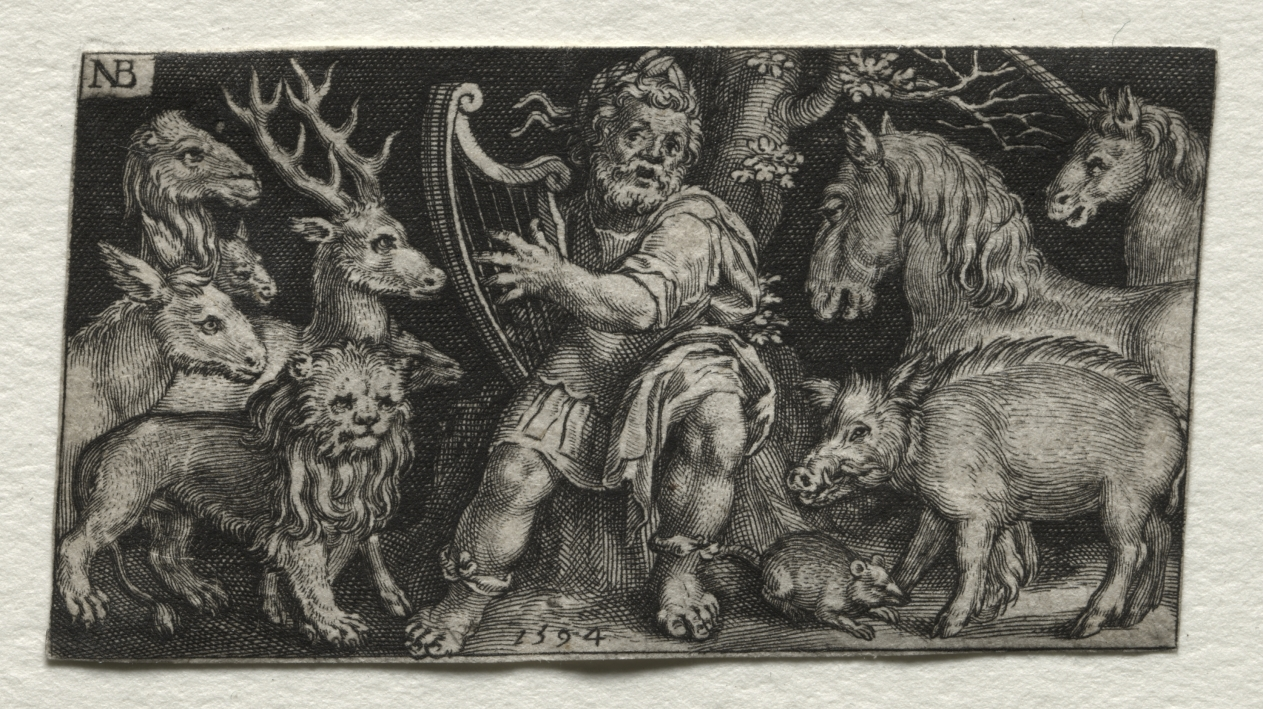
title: Orpheus Charming the Animals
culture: Netherlands, 16th century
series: Fighting Chimeras and Scenes to Aesop's Fables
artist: Nicolaes de Bruyn (Netherlandish, 1571–1656)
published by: A. van Londerseel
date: 1594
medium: engraving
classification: Print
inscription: upper left, in plate: NB[in monogram] ; lower center, in plate: 1594 ; VERSO, lower left, in graphite: B 4241 ; lower center, in graphite: 9[circled] FPO ; lower right, in graphite: 6264/150